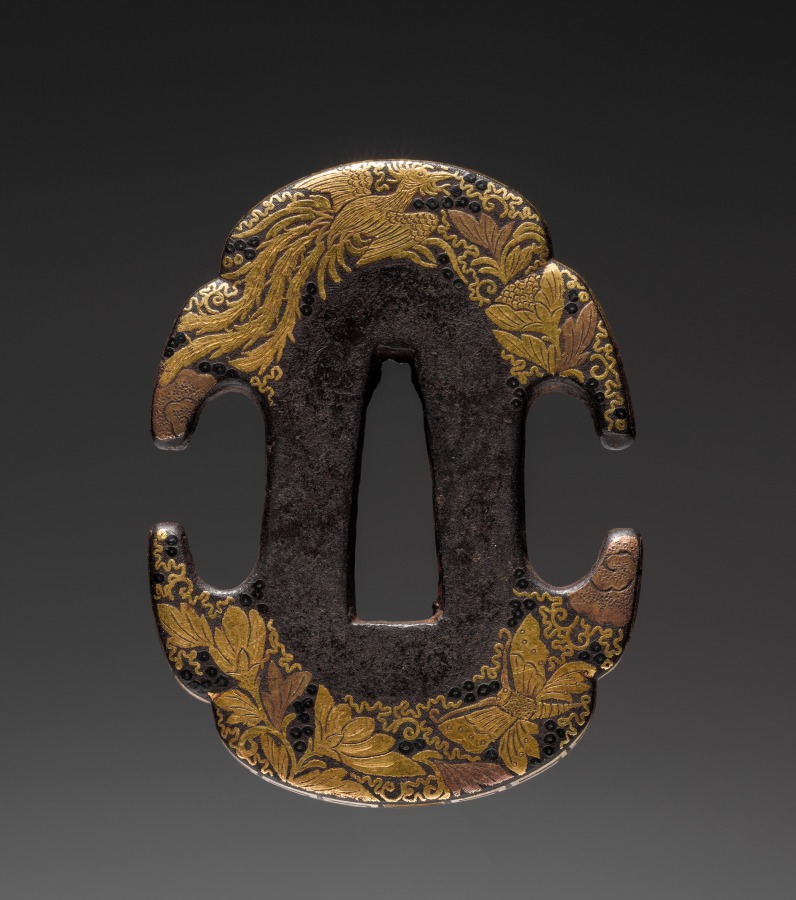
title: Sword Guard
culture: Japan, Edo period (1615–1868)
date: early 1800s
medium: iron with gold inlay (Kyoto type)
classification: Arms and Armor